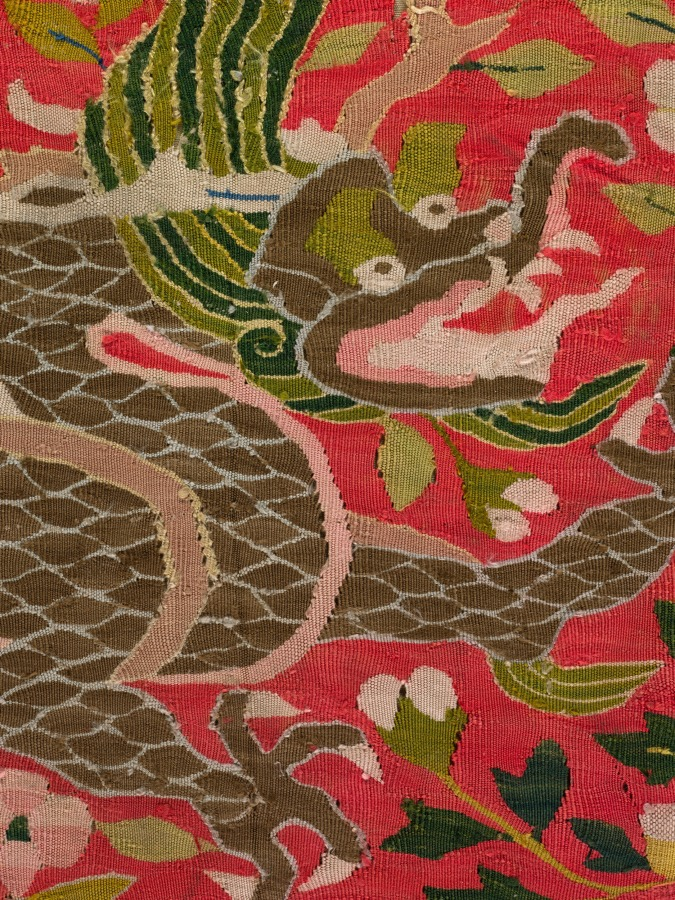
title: Tigers Chasing Deer, with Dragon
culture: China, Eastern, 11th-12th century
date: 1000s–1200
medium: Silk and gold thread; tapestry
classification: Textile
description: This reversible tapestry (kesi) fragment woven with silk and metal thread is a section from yardage likely intended for a garment, but no contemporary paintings exist to confirm this. The starting, bottom edge of the textile is preserved which indicates the bands at the base would have been the cuff ends of a garment. The design motifs of this kesi—a dragon at the top, bands of pearls and split palmettes, and tigers chasing deer with mushroom-shaped antlers—are a synthesis of Western and Chinese elements. The pearls, palmettes, and deer motifs originated in Iran and Sogdiana (an area east of the Caspian Sea and northwest of the Himalayas) but migrated east to China during the Tang dynasty (618–907). Although these motifs disappeared from Chinese art after the fall of the Tang, they survived in Central Asia. In contrast, the dragon is Chinese in origin, but here has a Central Asian form (particularly its extended snout).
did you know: Two similar kesi in Cleveland’s collection include 1991.3 and 1988.33. All are roughly the same size and given their size all three rectangular fragments may have been used as sutra (prayer leaves) covers. All three have two vertical crease lines that divide the fragment roughly into thirds and differential fading between the central third and outer thirds, which further substantiates this possible usage.